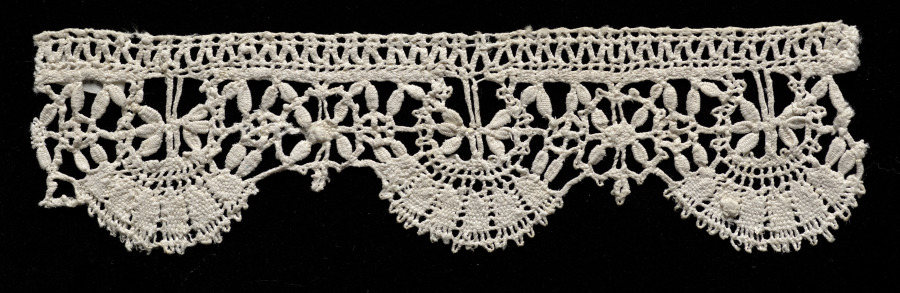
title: Lace Edging of Bell Points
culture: Italy, Genoa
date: 1600s–1700s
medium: Bobbin lace (rose lace)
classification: Lace